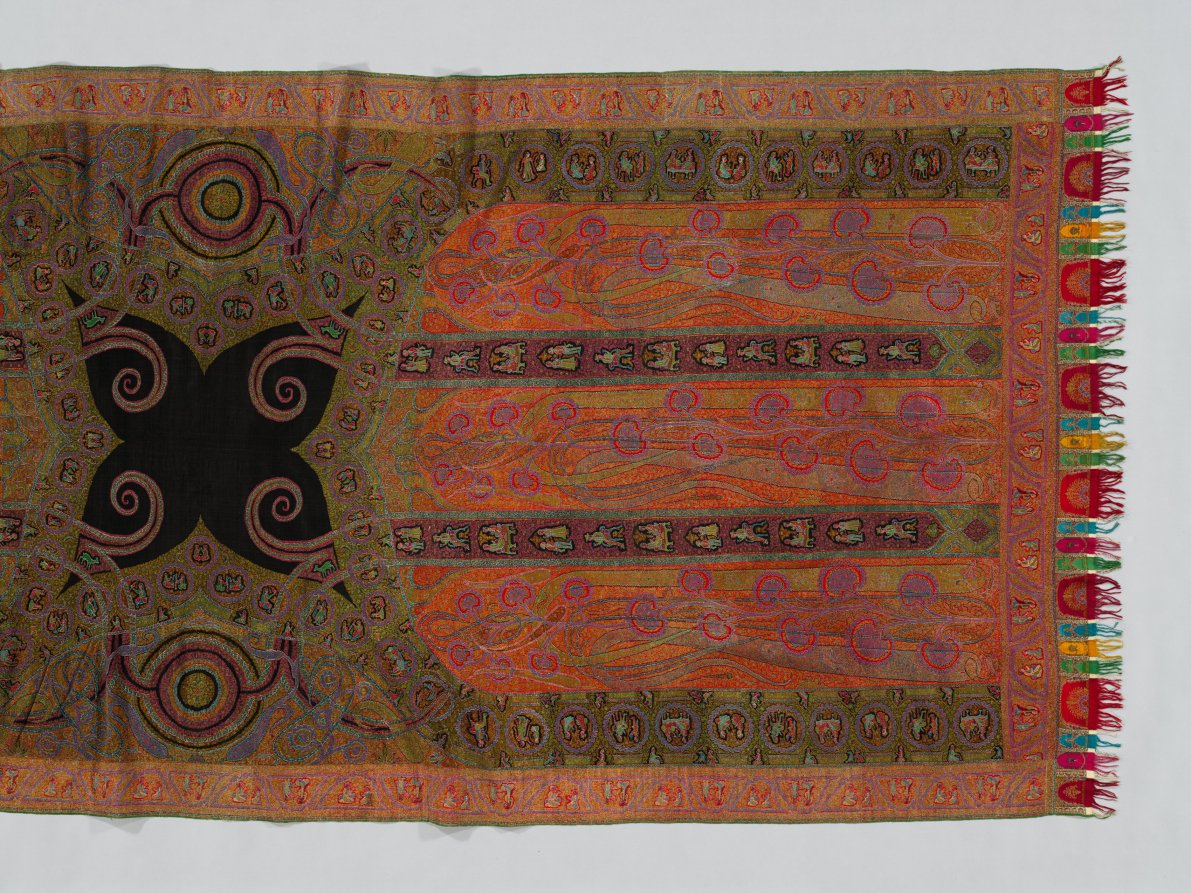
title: Long shawl with woven figures and animals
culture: India, Kashmir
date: c. 1885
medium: 2/2 twill tapestry weave, double interlocked and pieced: wool (possibly pashmina)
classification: Textile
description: Kashmir shawls from India were status symbols in Europe during the 1800s, and few are as rare as this woven example. Over 200 human figures take part in drinking, smoking, dancing, and falconry in the Indian princely scenes that enliven the shawl’s borders and four dark stripes. The stripes alternate with large elongated boteh, or paisley, motifs that intertwine with blossoming stems in a European style adapted by Kashmiri textile artists. This extraordinary woven shawl was probably made to dazzle the jury at one of the European expositions of industrial products, as almost all other figural shawls were embroidered. It was woven in many pieces and then skillfully joined with colorful harlequin end borders.